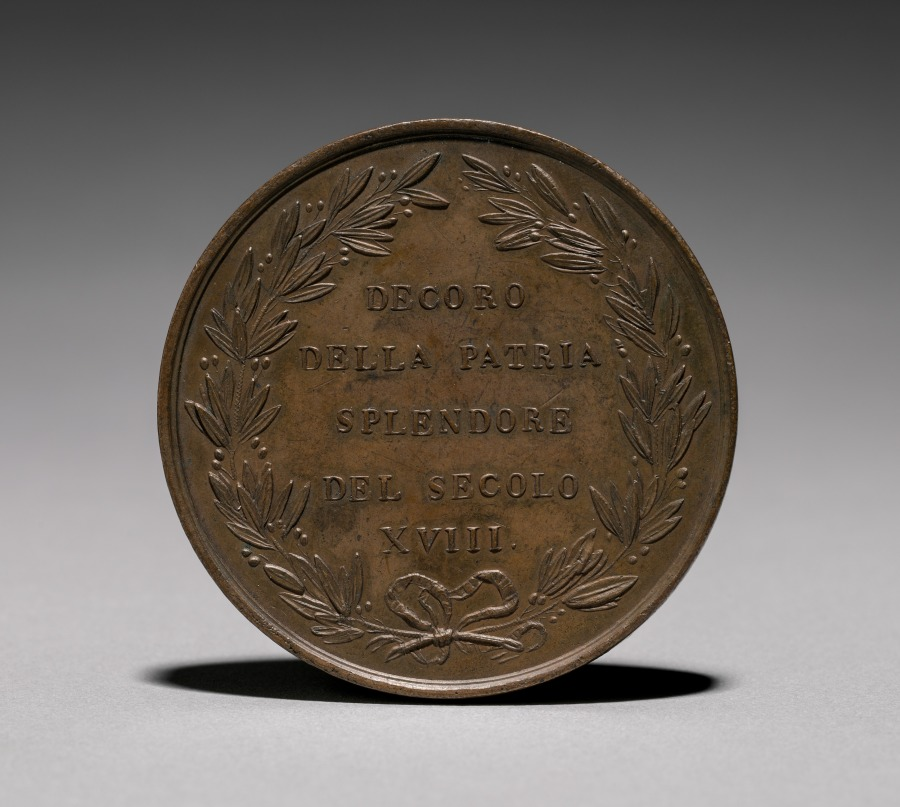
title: Medal: Guiseppe Rossi Pittore (reverse)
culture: Italy, 19th century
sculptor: Luigi Cossa (Italian, 1789–1867)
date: early to mid-1800s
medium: bronze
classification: Metalwork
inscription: "DECORO DELLA PATRIA SPLENDORE DEL SECOLO XVIII."